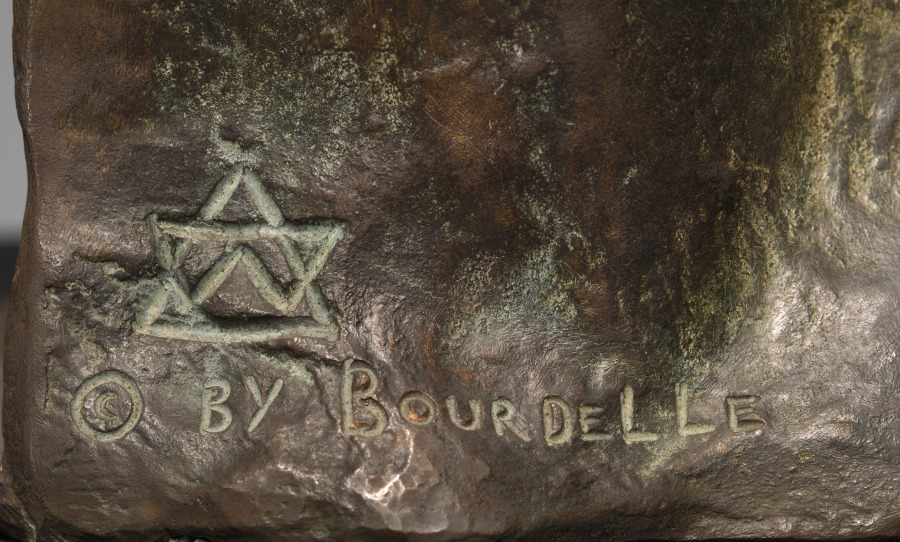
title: Mask of Hercules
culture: France, 20th century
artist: Emile Antoine Bourdelle (French, 1861–1929)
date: 1909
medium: bronze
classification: Sculpture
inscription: Inscribed at neck, lower left: "© Bourdelle"; beneath right ear: "E. Godard/Fondr Paris / 7"